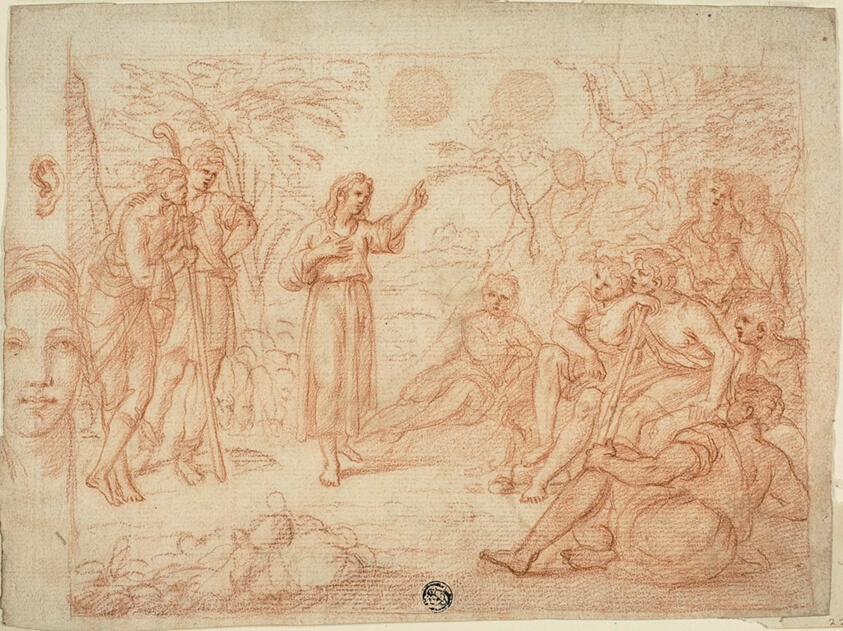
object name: Drawing and Watercolor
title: Joseph Interpreting His Dream to His Brothers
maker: School of Carlo Maratti (Italian, 1625-1713)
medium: Red chalk on ivory laid paper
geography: Italy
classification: chalk; drawings (visual works); prints and drawing